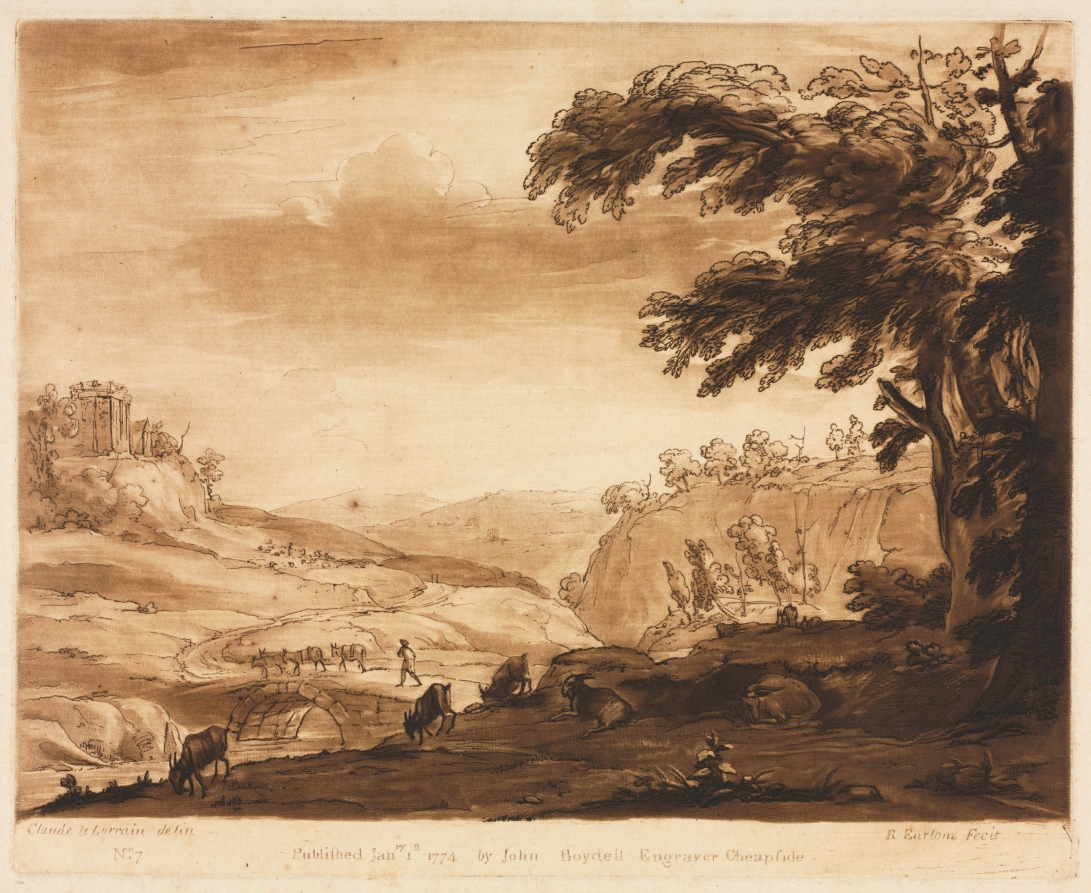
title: Liber Veritatis: No. 7, An Island Scene of a Mountainous Country with Cattle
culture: England, 18th century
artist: Richard Earlom (British, 1743–1822)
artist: after Claude Lorrain (French, 1604–1682)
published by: John Boydell (British, 1720–1804)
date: 1774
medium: etching and mezzotint printed in brown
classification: Print